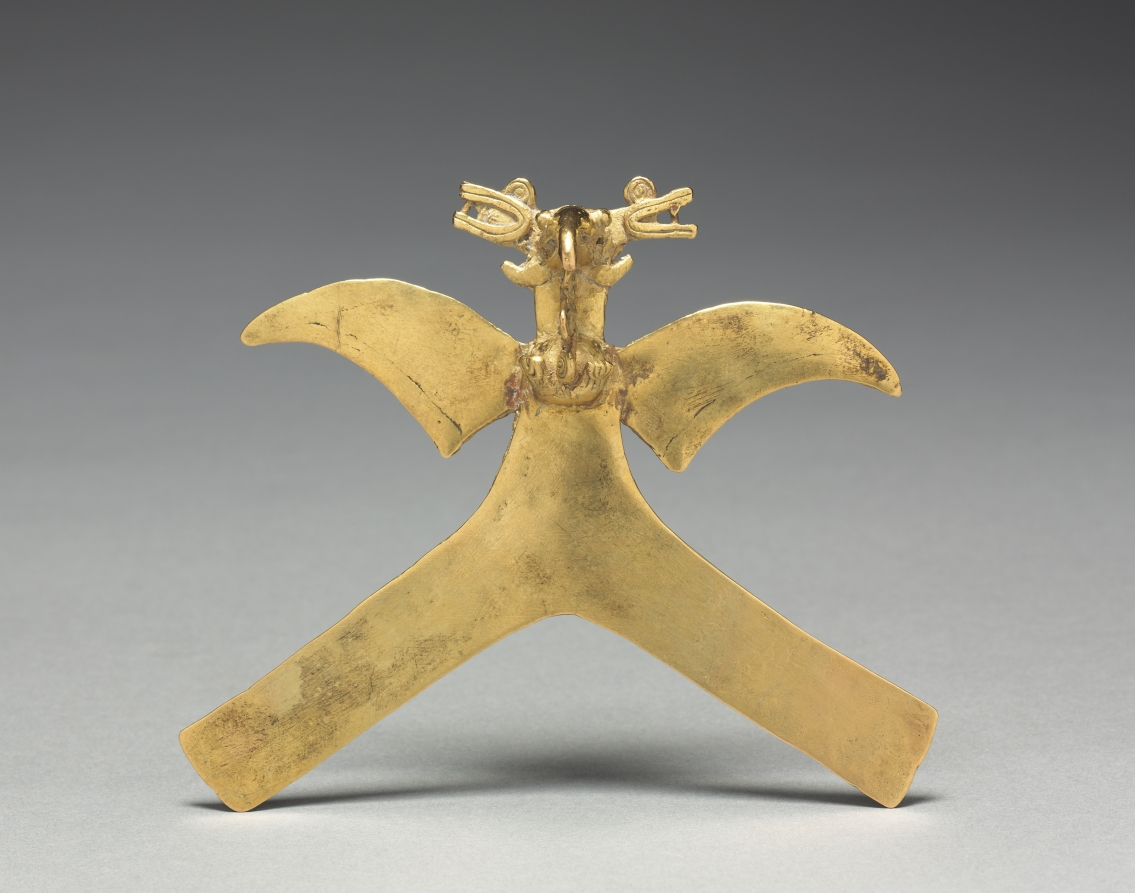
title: Bird Pendant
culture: Costa Rica, Diquís region, or Panama, 11th-16th century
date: c. 1000–1550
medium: cast gold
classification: Metalwork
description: Among the pendants shown here are a crustacean (1943.290), an animal-headed figure (1948.18), and two pendants featuring birds (1951.442 and 1946.223). The latter were dubbed aguilas (eagles) by Christopher Columbus, who saw natives wearing them as necklace ornaments. Modern researchers are not as sure of the species shown, but some believe that they are birds of prey because talons and beaks are prominent and often clutch something, in one example here a small, disembodied head that holds a clapper. In both examples, two tufts in the form of crocodiles in profile flank the birds’ heads.